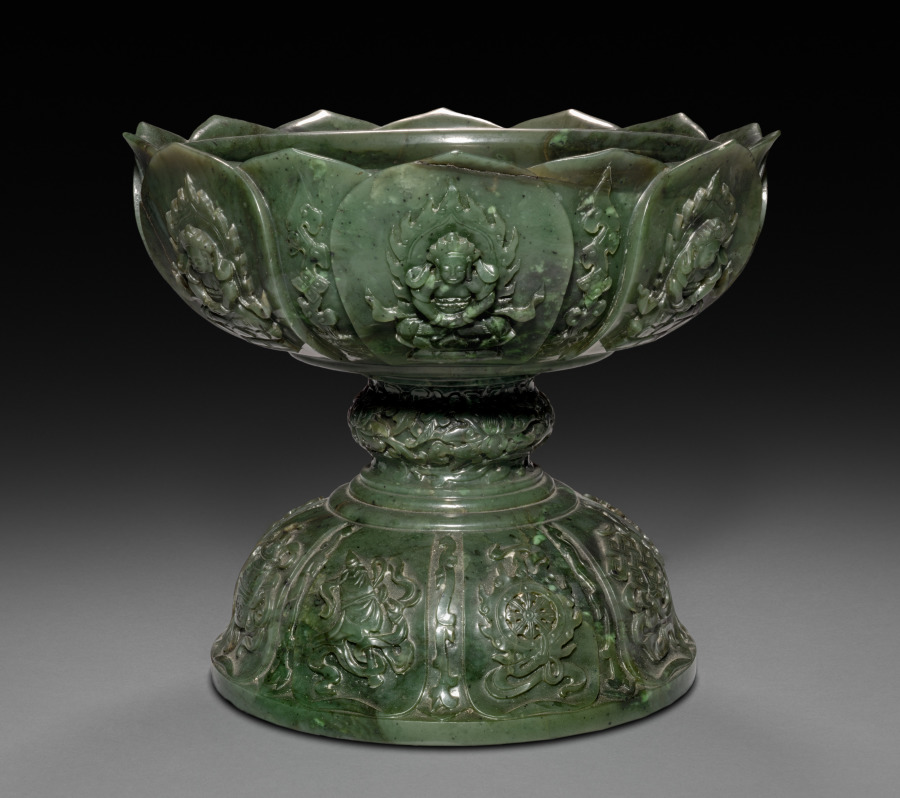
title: Offering Container in Form of Alms Bowl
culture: China, Qing dynasty (1644-1911)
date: 1700s or later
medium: jade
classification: Jade